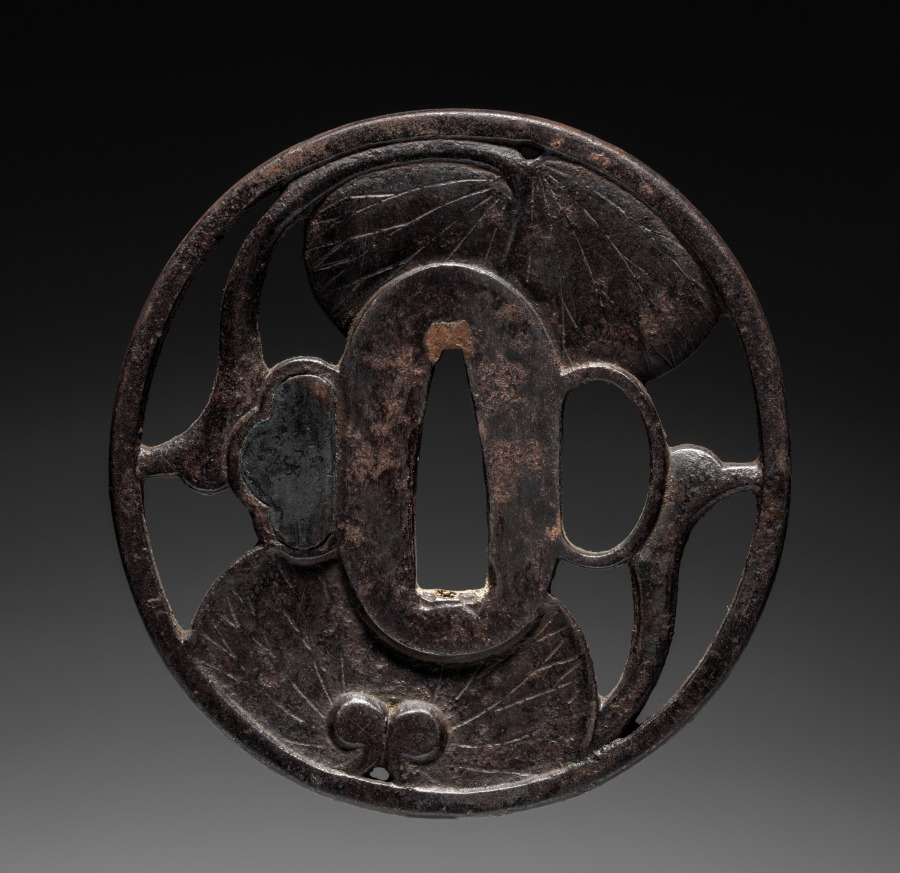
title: Sword Guard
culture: Japan, Edo period (1615–1868)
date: mid-1700s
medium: iron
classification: Arms and Armor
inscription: Signature: Kinai, residing in Echizen province